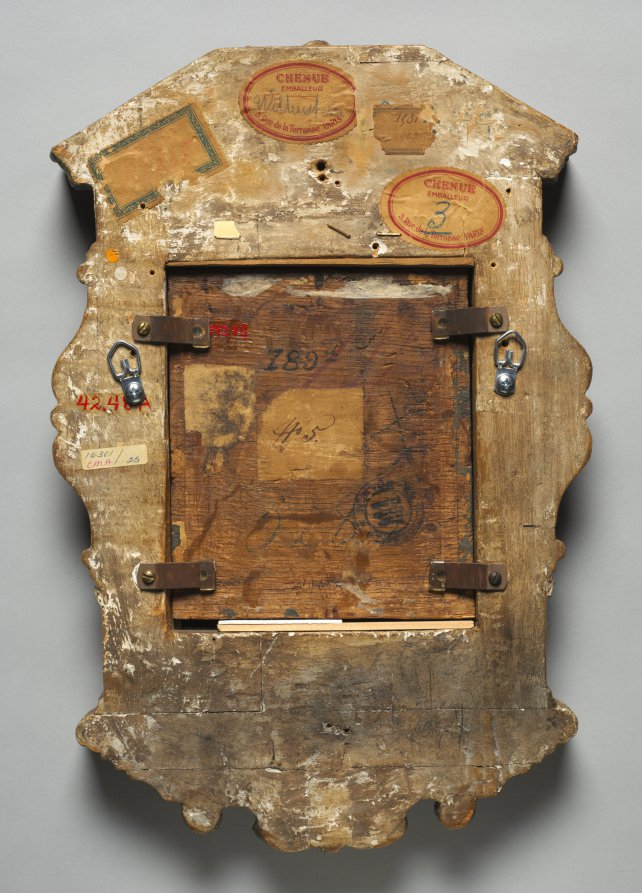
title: Portrait of a Woman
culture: Netherlandish, active France, 16th century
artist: Corneille de Lyon (Netherlandish, 1500/10–1574)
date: c. 1540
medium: oil on wood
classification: Painting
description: Corneille de Lyon worked both for the French court and wealthy merchants. His distinctive northern style stood in contrast to the taste for Italian Renaissance painting and connected closely to portrait miniatures and manuscript painting. Recent conservation treatment has restored the smooth, enamel-like background and the meticulous rendering of detail.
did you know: Gold leaf was applied to the details of the sitter’s headdress and embroidery on her dress.